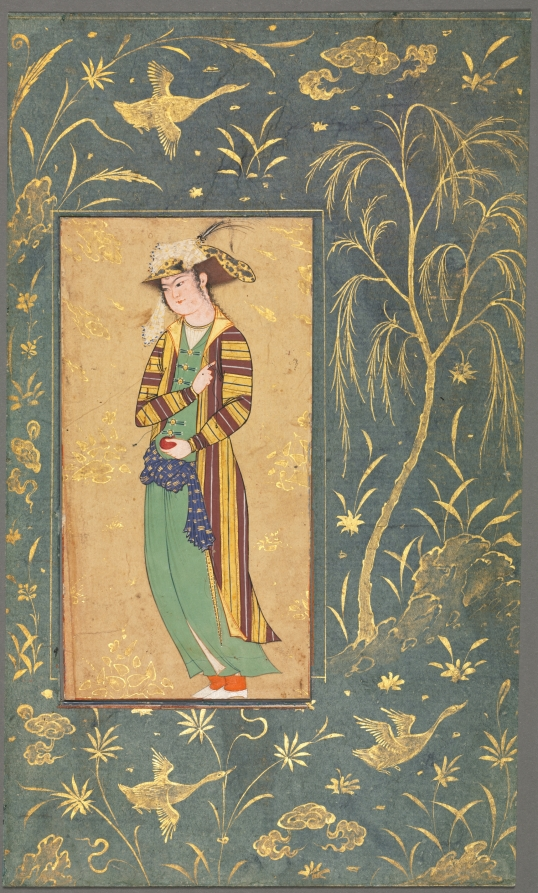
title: Youth Holding a Pomegranate; Illustration from a Single Page Manuscript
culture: Iran, Isfahan, Safavid period (1501-1722)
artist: style of Riza-yi Abbasi (Iranian)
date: c.1600–1650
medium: opaque watercolor and gold on paper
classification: Manuscript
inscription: script: none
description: This single painting of a youth holding a favored pomegranate reflects the style of the most gifted painter at the court of Shah ‘Abbas, Riza-yi ‘Abbasi, whose work inspired numerous adaptations and copies by other artists. In this painting, the youth is attired less extravagantly—with less gold thread than those in the two paintings nearby—presumably conveying a lower status. Gold thread was so expensive that rulers occasionally burned old fabrics for the monetary value of the gold.